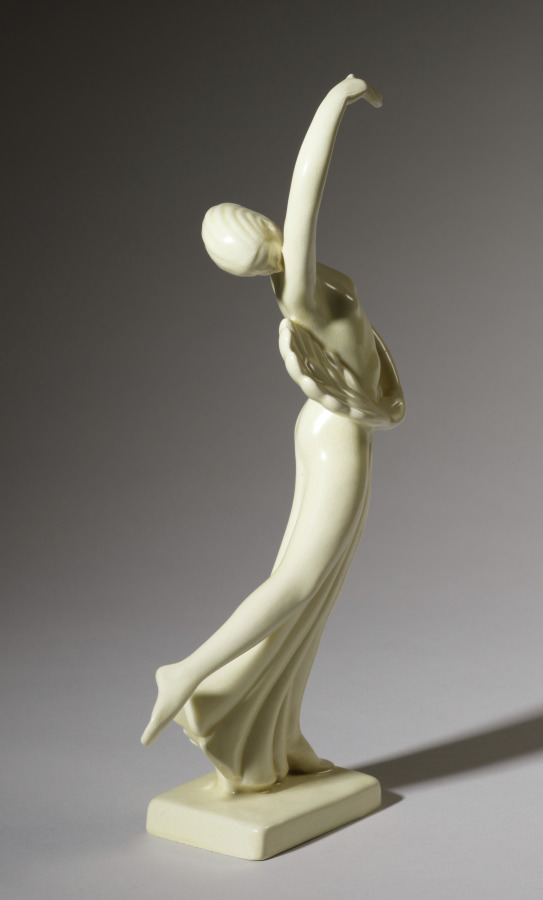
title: Fan Dancer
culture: America, Ohio, Cleveland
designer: Waylande Gregory (American, 1905–1971)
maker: Cowan Pottery Studio (America, Rocky River, Ohio, 1920–1931)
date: 1928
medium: glazed ceramic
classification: Ceramic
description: A stamp on the bottom of this ceramic sculpture indicates that it was produced at the Cowan Pottery studios. Although unsigned, it was most likely designed by Waylande Gregory, one of the studio’s premiere artists. In 1928 the studio’s founder, R. Guy Cowan, brought Gregory to Cleveland from Chicago, where he was developing a reputation as a talented young sculptor. Cowan Pottery, located in Lakewood (1912–17) and later Rocky River (1919–32), Ohio, began producing ceramic sculpture in the mid-1920s, launching its most fertile creative period. Cowan employed a large team of talented artists at the studio, including Walter Sinz, Thelma Frazier Winter, and Viktor Schreckengost. The studio brought national fame to Cleveland ceramists, but was forced to close due to economic circumstances in 1932.